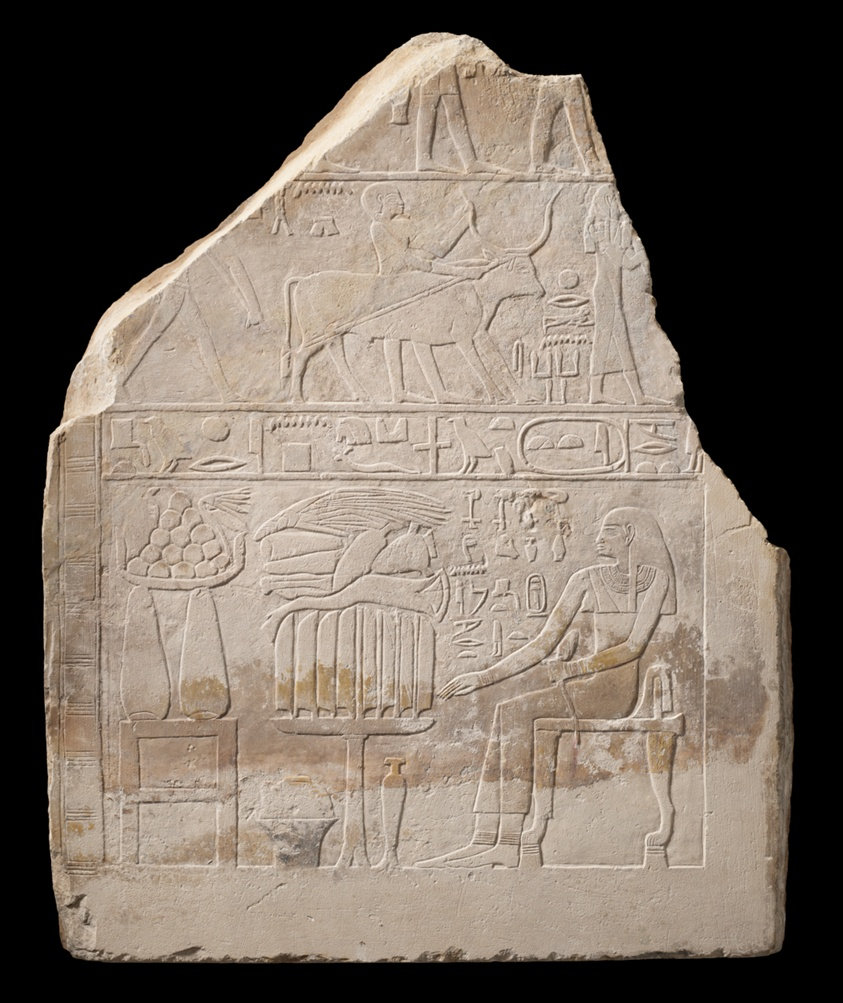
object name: Architectural fragment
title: Relief Fragment Depicting Merettetiiyet with Offerings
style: first intermediate period, ancient, egyptian, tenth dynasty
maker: Egyptian; offering niche of Merettetiiyet, Teti Pyramid Cemetery, Saqqara, Egypt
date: First Intermediate Period, Dynasty 10, about 2050 BCE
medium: Limestone and pigment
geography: Saqqara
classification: architectural fragment; stone; sculpture; ancient art; Stelae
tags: funerary art, cartouches, cows, food, Hieroglyphs, oxen, women